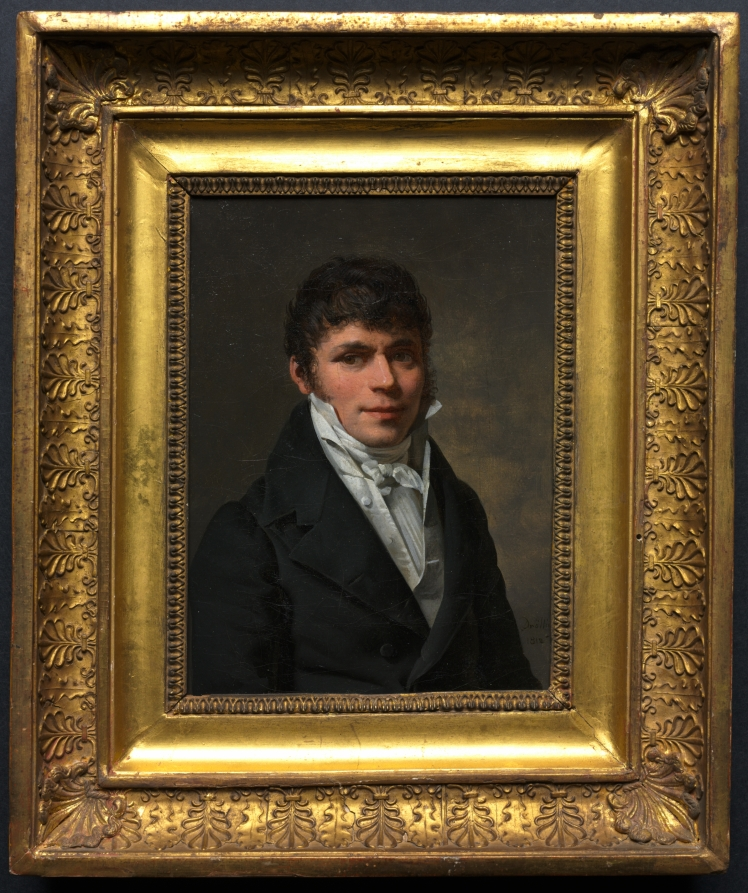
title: Nicolas Louis Faret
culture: France, 19th century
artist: Martin Drölling (French, 1752–1817)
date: 1812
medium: oil on canvas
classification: Painting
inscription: "Drollin(g)" ("g" obscured by frame) and "1812" in black paint, lower right Signed, dated, and inscribed with the sitter's name on the back of the stretcher